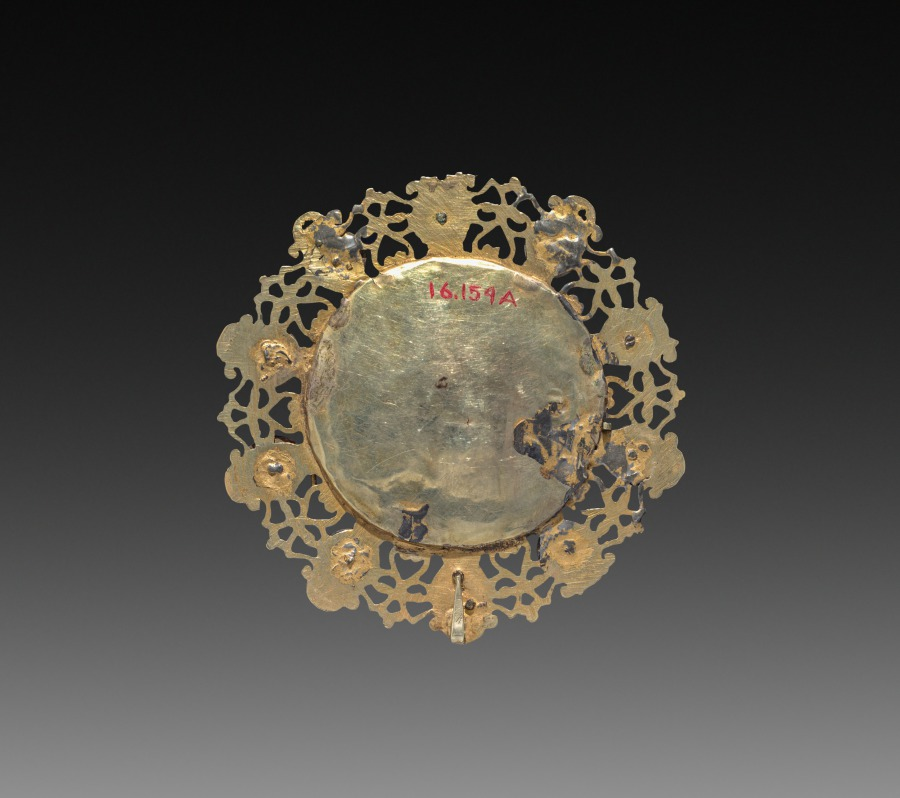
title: Pendant (part 1)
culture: Belgium, 18th century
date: 1700s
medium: silver gilt and enamel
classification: Metalwork